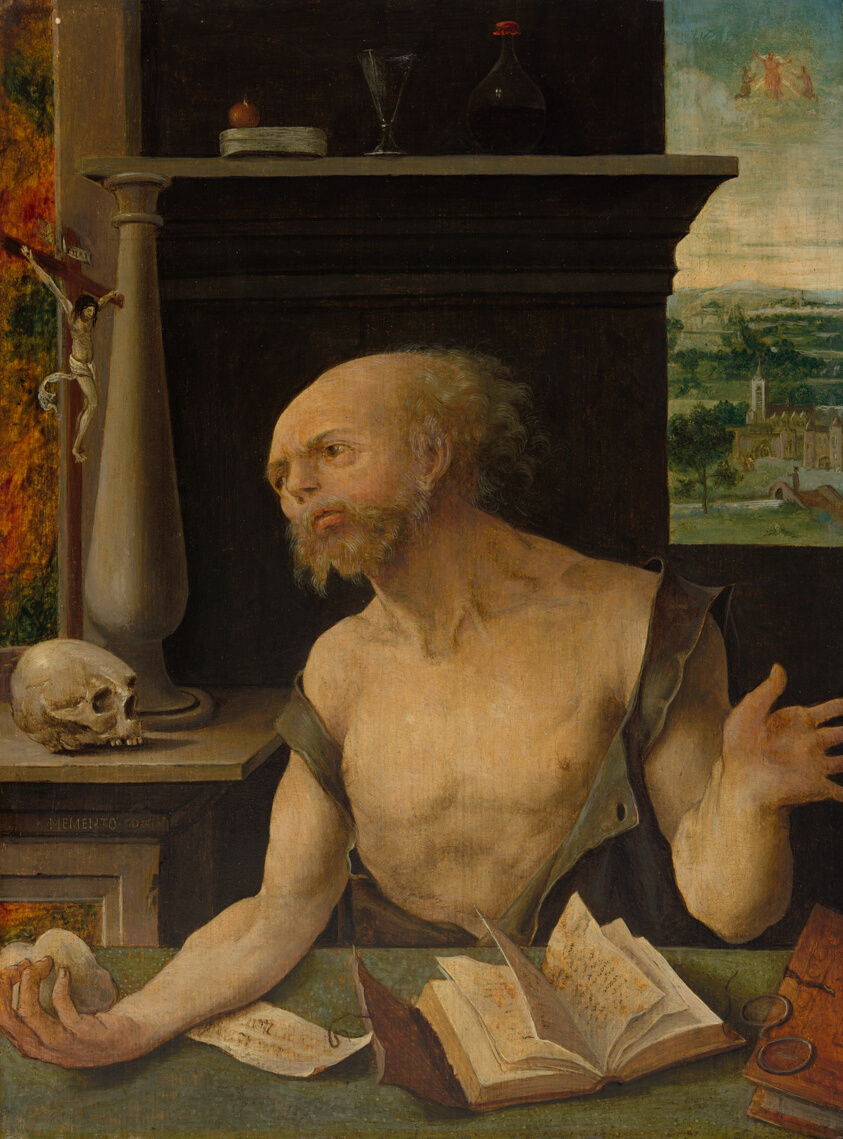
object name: Painting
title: Saint Jerome in Penitence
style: 16th Century, Renaissance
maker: Master of the Lille Adoration (Netherlandish, active about 1520–40)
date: 1525–30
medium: Oil on panel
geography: Netherlands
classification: painting; paint; oil on panel; oil paintings (visual works); european painting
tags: saints, angels, bibles, book, Christian subjects, Christianity, crucifixions, hermits, interior, landscape, language, man, religion, religious, skulls